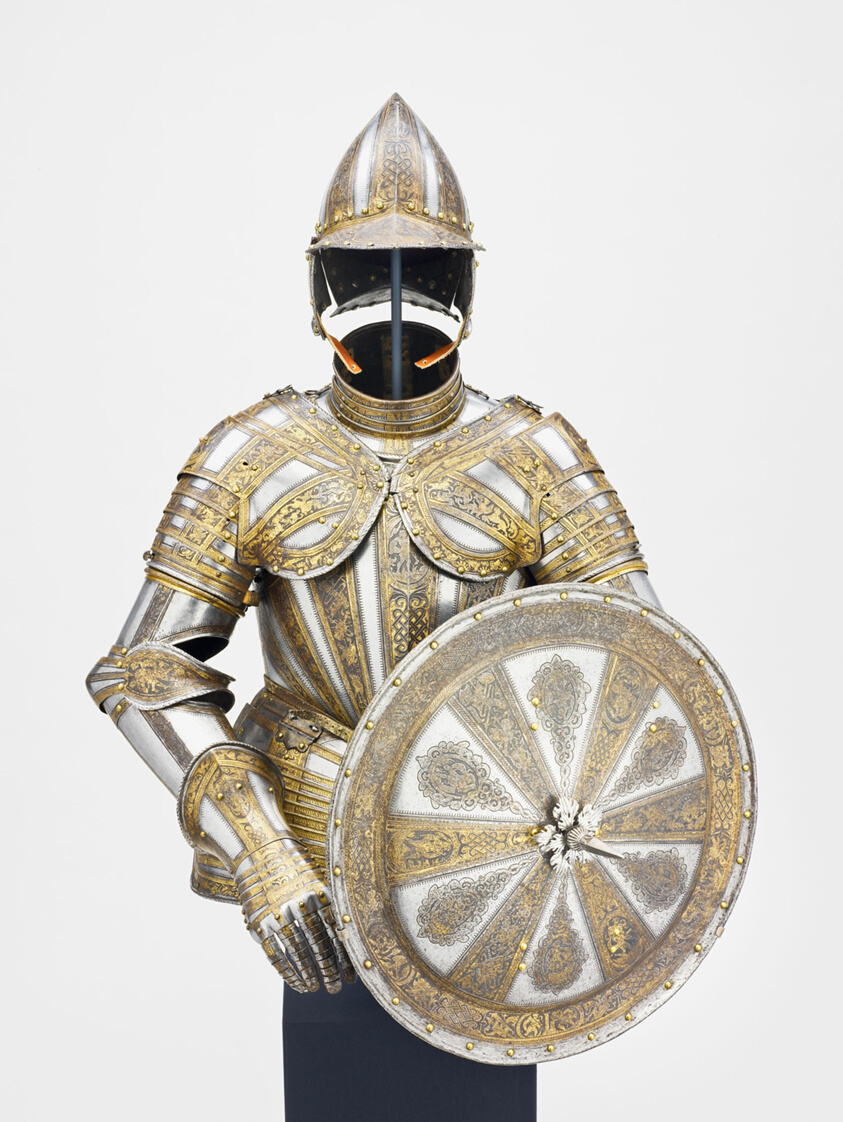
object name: Armor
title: Infantry Armor and Targe (Shield)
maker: Master I.P.F. (Italian); Milan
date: 1590/1600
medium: Steel, gilding, brass, and leather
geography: Milan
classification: suit; armor; arms and armor